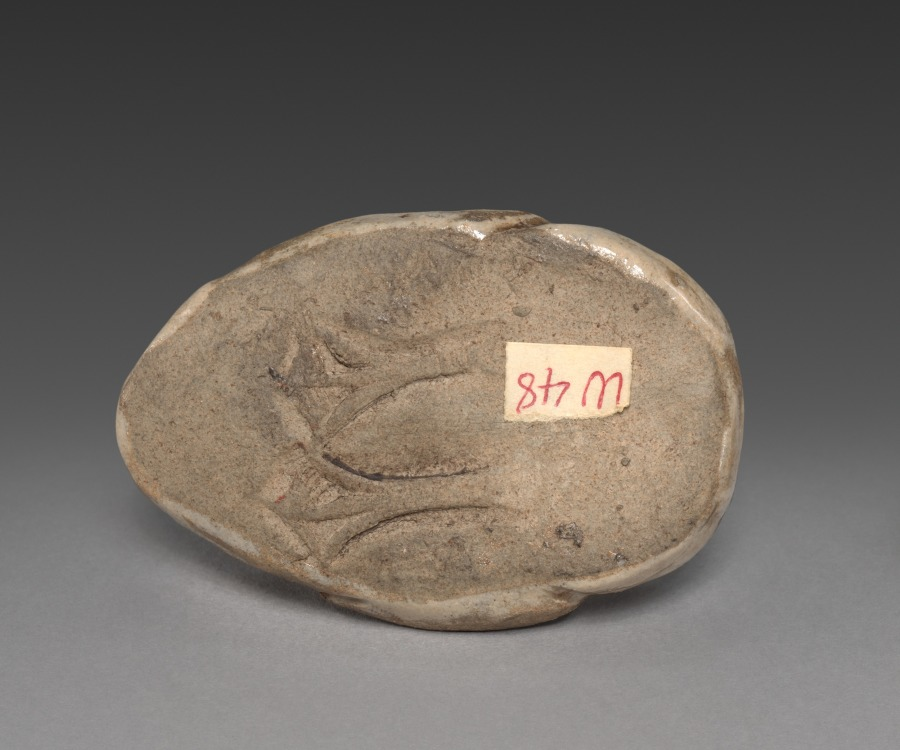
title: Box of Incense Container (Kōgō) in the Shape of a Mandarin Duck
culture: Japan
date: c. 1700–1868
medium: pottery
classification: Ceramic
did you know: The artist incised the bird's feet on the bottom of the box.